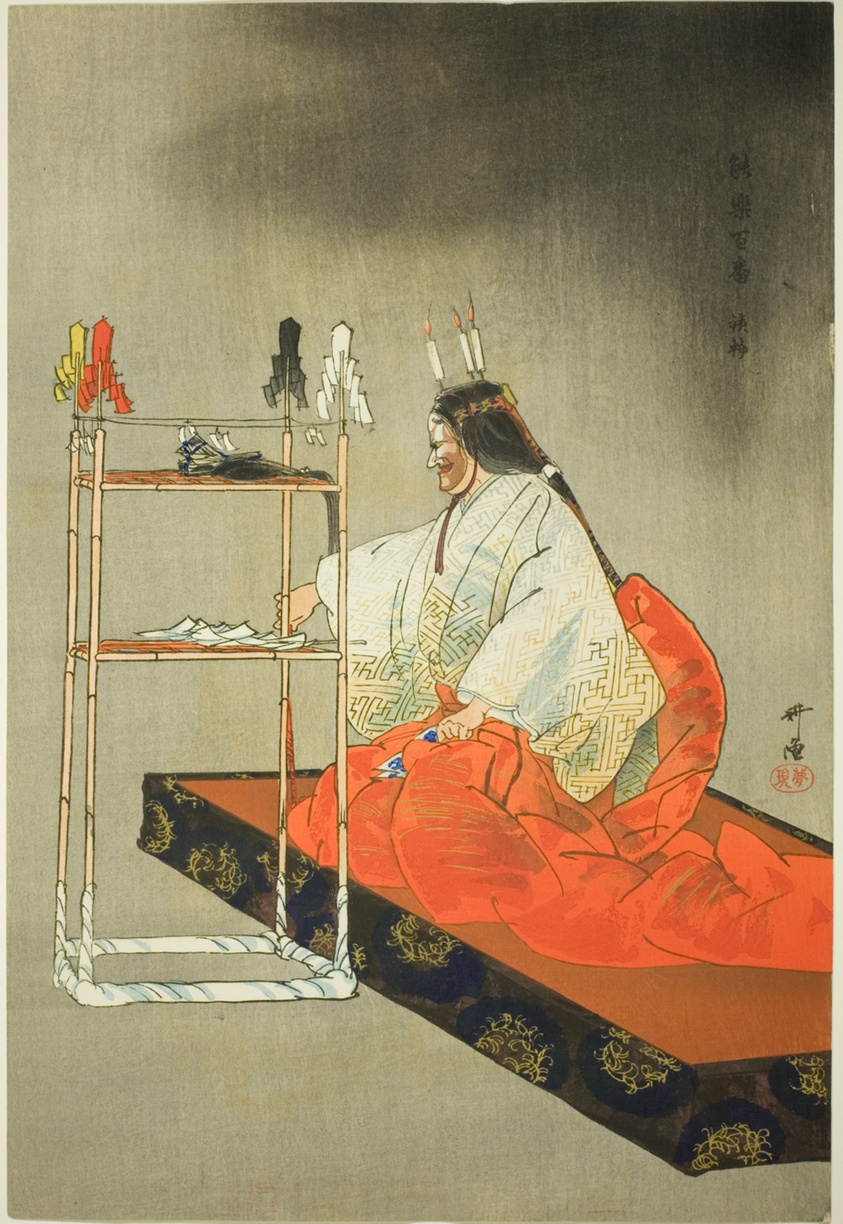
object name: Print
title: Kanehira, from the series "One Hundred No Dramas (Nogaku hyakuban)"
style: Japanese (culture or style)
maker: Tsukioka Kogyo; Japanese, 1869-1927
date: 1898/1903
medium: Color woodblock print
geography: Japan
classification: woodblock print; print; asian art